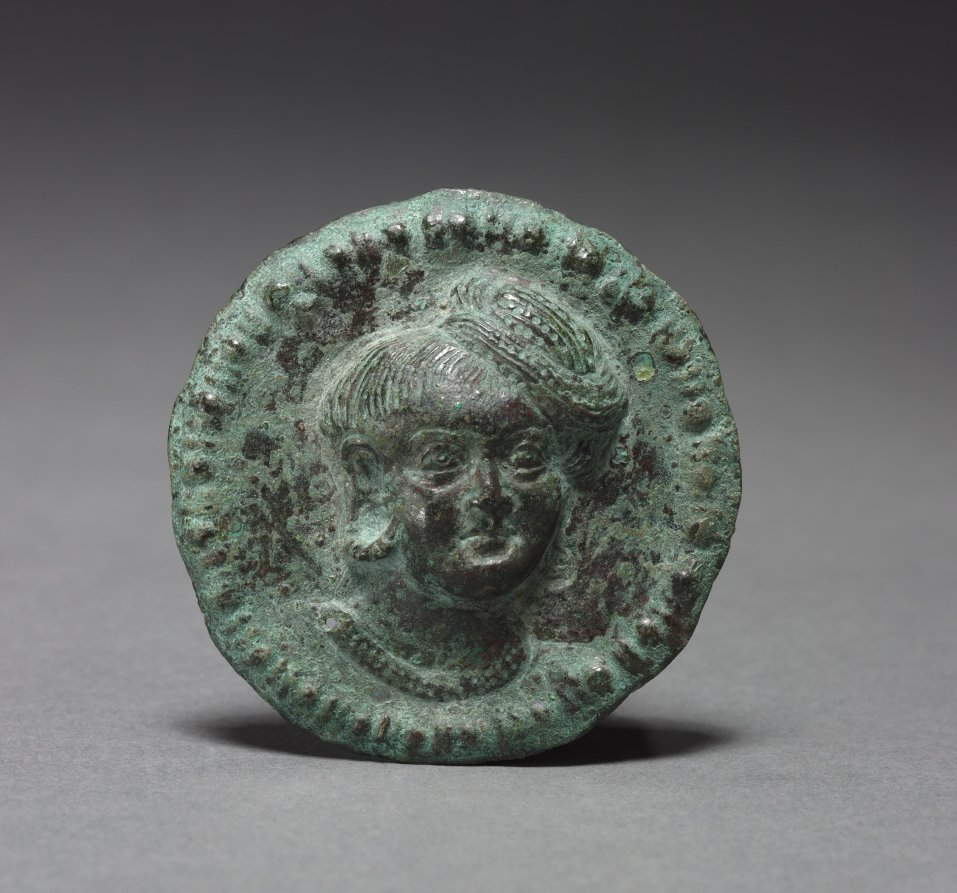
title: Roundel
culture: India, Satavahana period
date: c. 100–1 BCE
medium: bronze with repoussé and chased designs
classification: Sculpture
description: The form of a medallion with a figural bust and bead-and-reel border indicates the artist’s familiarity with Greco-Roman objects. The figure itself, however, is Indian, with voluminous, coiled coiffures and prominent jewelry. This object was probably worn as an ornament on a belt or girdle.